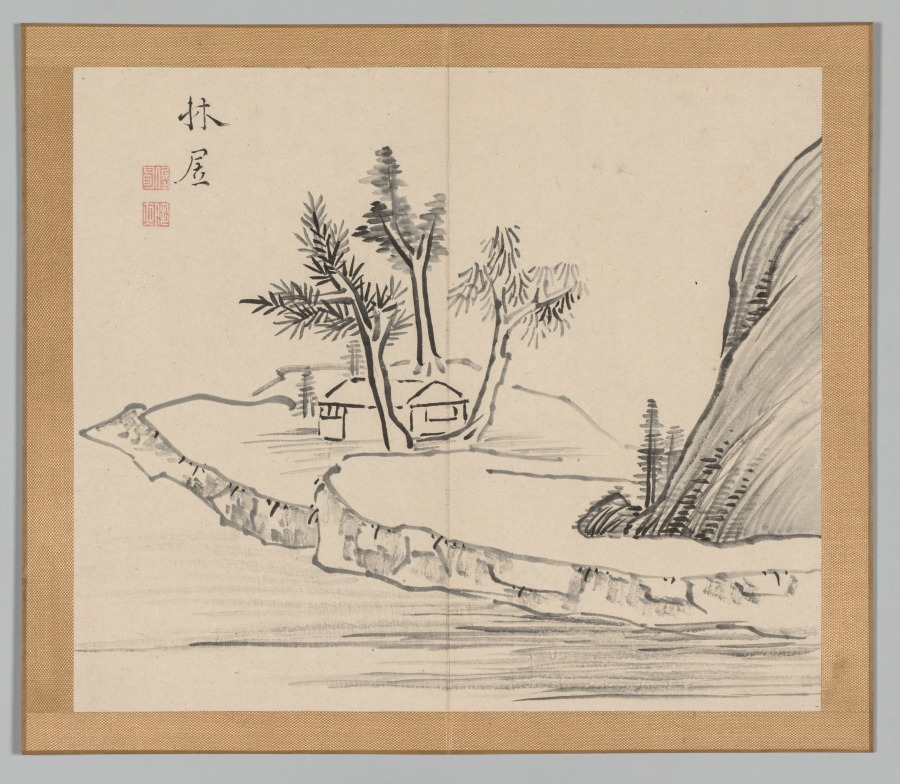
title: Reverberations of Taiga, Volume 2 (leaf 22)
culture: Japan, Edo period (1615–1868)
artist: Aoki Shukuya (Japanese, d. 1802)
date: mid- to late 1700s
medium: double-leaf from a pair of albums; ink and light color on paper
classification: Portfolio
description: Traditionally, young painters in Japan began their studies with an established master-painter. The master's compositions invariably became models that the apprentice copied to learn various ink and brush techniques. Shukuya was a pupil of the famous Kyoto artist Ikeno Taiga, whose style is reflected in these sketches of rocks, trees, and mountains.